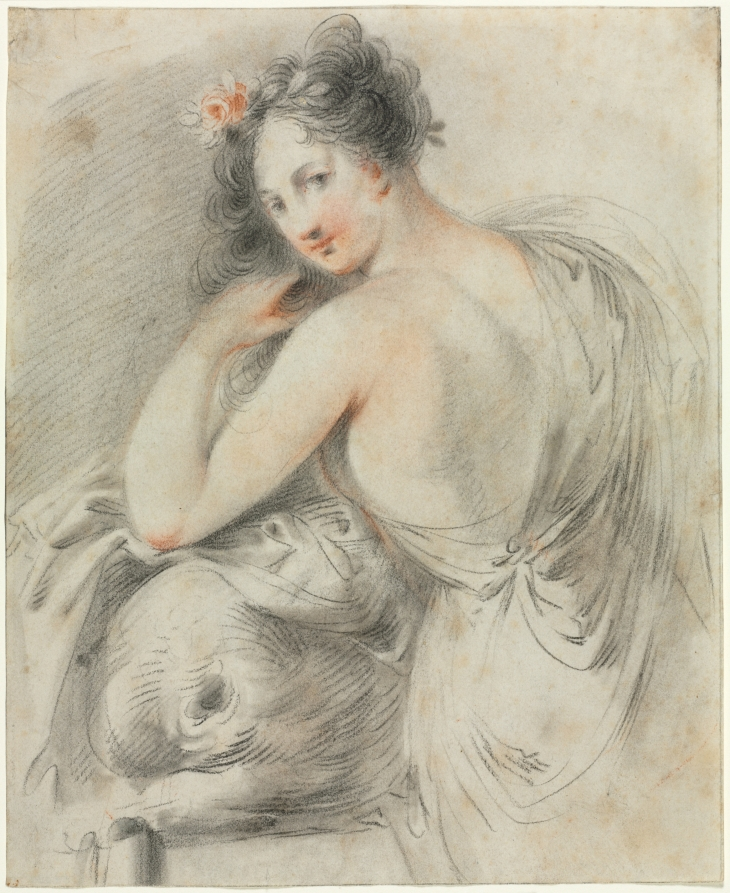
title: Baccante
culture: England, 18th century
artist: Francesco Bartolozzi (British, 1727–1815)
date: c. 1747–1815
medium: black and red chalk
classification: Drawing